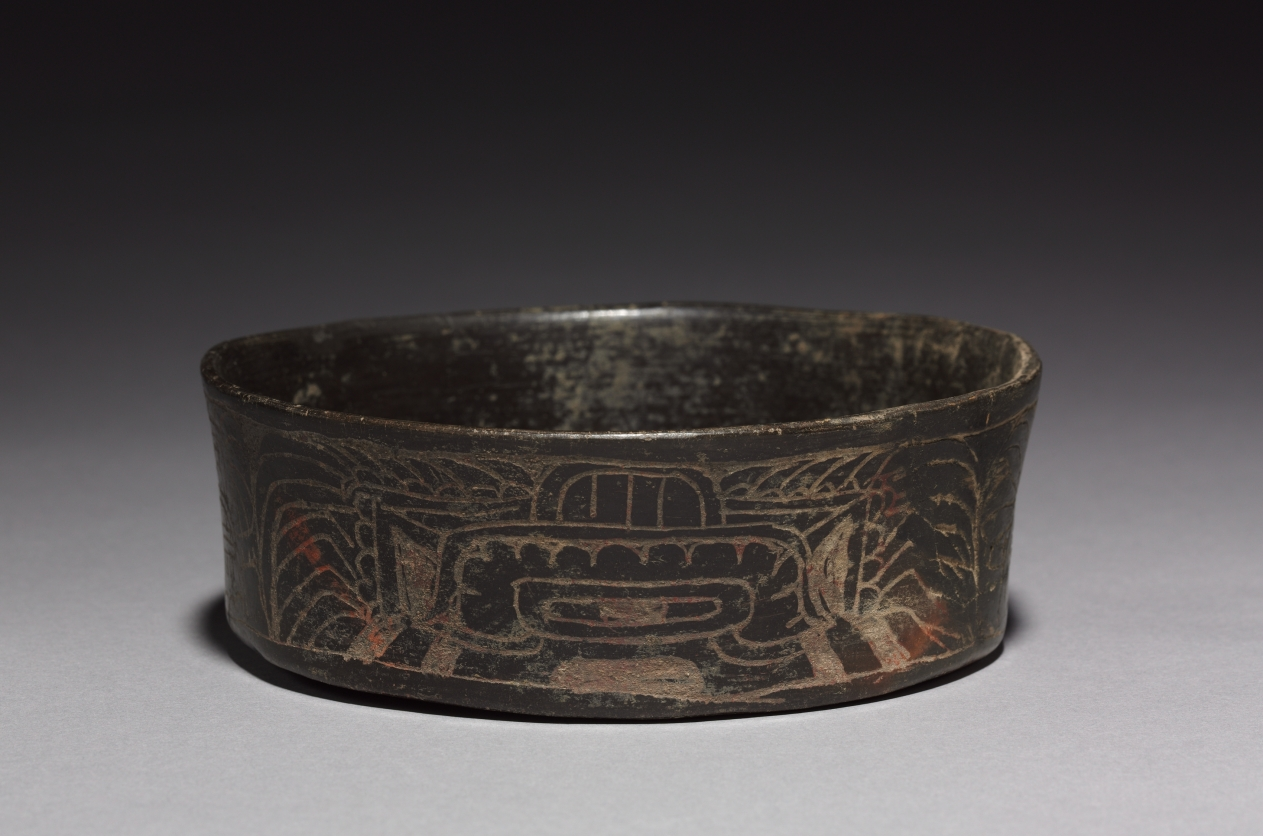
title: Bowl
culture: Central Mexico, Teotihuacán, Classic period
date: 1–550 CE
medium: ceramic, pigment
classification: Stone